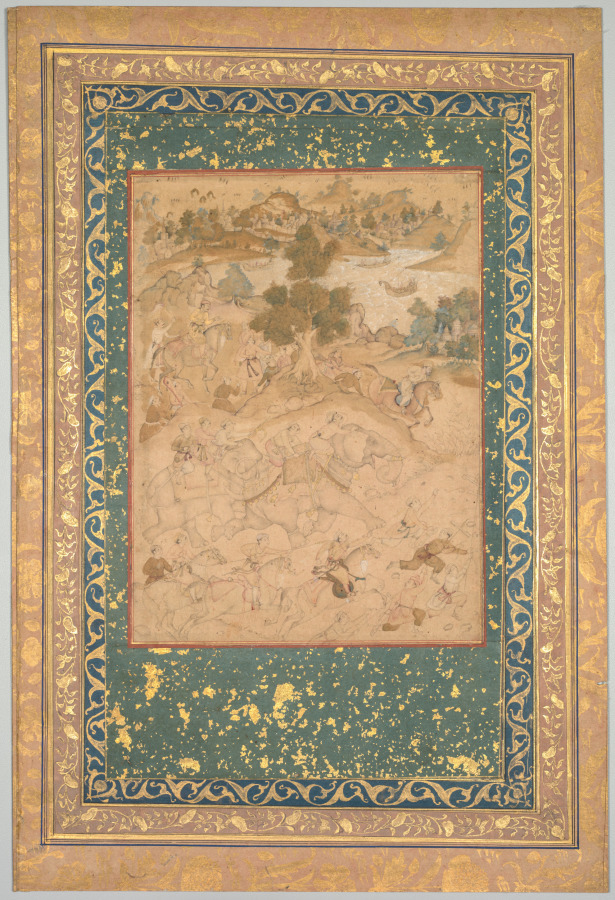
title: Akbar supervising the capture of wild elephants at Malwa in 1564, painting 90 from an Akbar-nama (Book of Akbar) of Abu’l Fazl (Indian 1551–1602)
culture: India, Mughal court, made for Emperor Akbar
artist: attributed to Farukh Chela (Indian)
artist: or Govardhan (Indian, active c.1596–1645)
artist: or Dhanraj (Indian)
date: c. 1602–3; borders added c. 1700s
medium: ink with use of colors and gold on paper, mounted on an album page with borders of gold-decorated buff and blue paper (verso); calligraphy by Faqir Ali (recto)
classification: Painting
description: This painting is from a biography of Akbar made shortly before his death. It depicts a historical event from early in his reign when he encountered a herd of wild elephants and captured many of them for his royal stables. Akbar rides horseback in the upper left, directing his men as two trained elephants give chase in the foreground. The Mughals caught wild elephants by chasing them with tame elephants, then tethering them together and feeding them their favorite food. European prints had made their way into Akbar’s collection, and they provided the visual source for distant cityscapes, rolling hills, and less densely colored paintings.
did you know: A yak-tail flywhisk, ancient Indian symbol of sovereignty, is held up for Akbar.